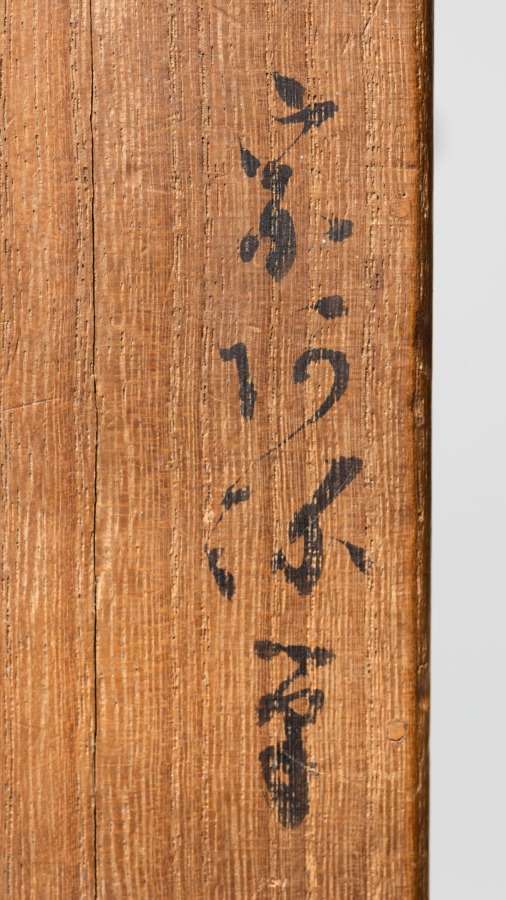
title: Landscape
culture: Japan, Edo period (1615–1868)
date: early 1600s to mid-1800s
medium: hanging scroll; ink on paper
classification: Painting